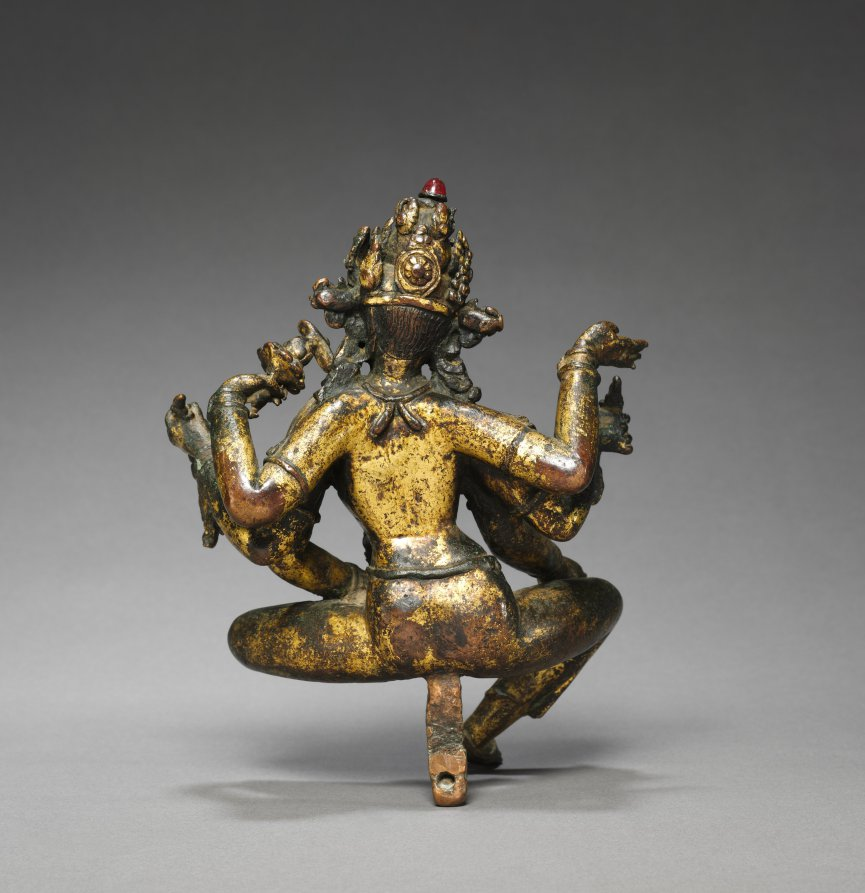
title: Vasudhara, Goddess of Abundance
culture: Nepal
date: 1300s–1400s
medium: gilt bronze and semiprecious stones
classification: Sculpture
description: In Nepal this female counterpart of the god of wealth is one of the most popular divinities. This image was set up in either a domestic shrine or a Buddhist monastery, where devotees would pray to her for wealth, prosperity, and children. In each of her six arms she holds objects pertaining to life and abundance: jewels, an overflowing pot, and a sheaf of wheat. A Buddhist philosophical text rests on top of the lotus flower she holds in her topmost left hand, suggesting that wealth and prosperity can derive from the acquisition of true knowledge.